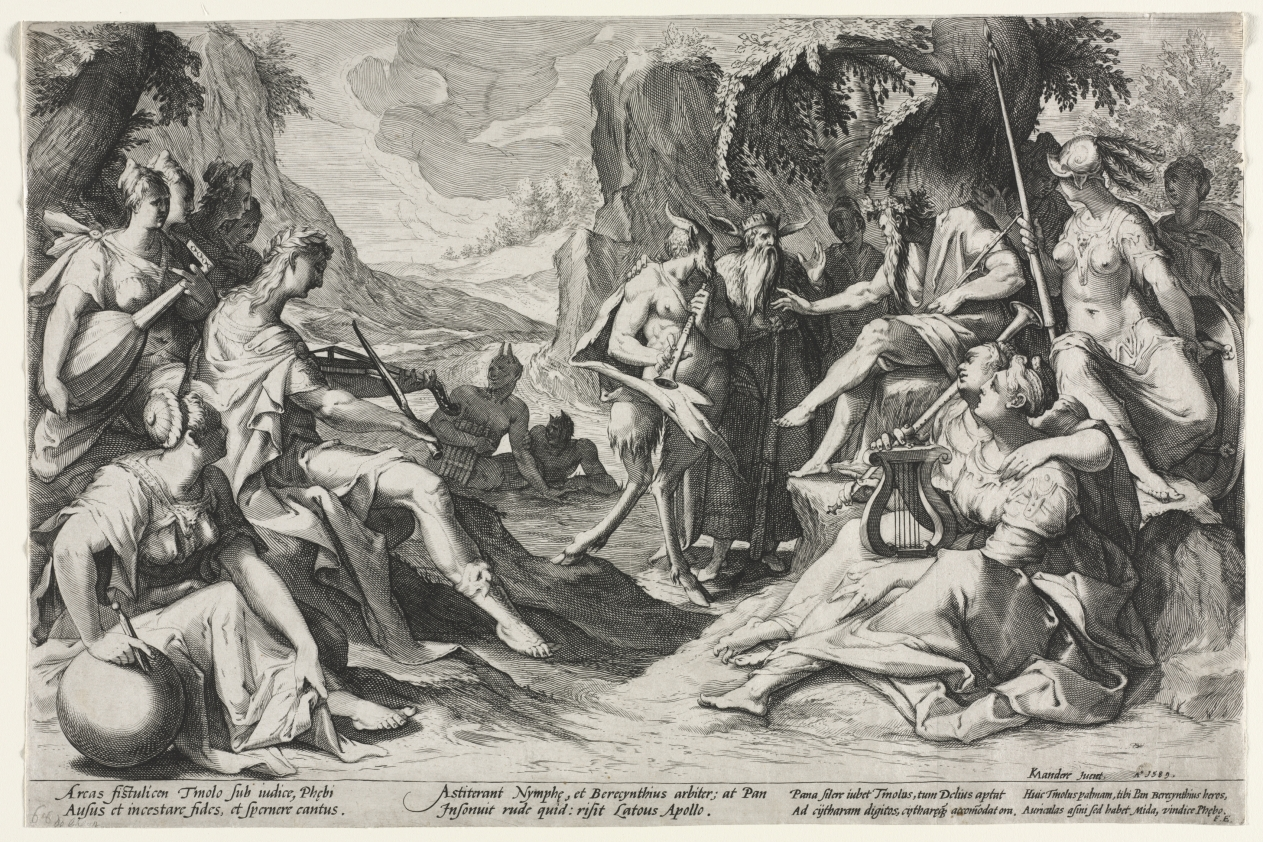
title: The Judgment of Midas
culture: Netherlands, 16th century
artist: Nicolaes Clock (Dutch)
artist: after Karel I van Mander (Netherlandish, 1548–1606)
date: 1589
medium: engraving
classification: Print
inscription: lower right, in plate: KM[in monogram]andere Iuent. A°1598. ; across bottom, in plate: Arcas fistulicen Tmolo sub iudice, Phaebi / Ausus et incestare fides, et spernere cantus. / Astiterant Nymphae, et Berecynthius arbiter; at Pan / Insonuit rde quid: risit Latous Apollo. / Pana silere iubet Tmolus, tum Delius aptat / Ad cÿtharam digitos, cytharaeque accomodat ora. / Huic Tmolus palmam, tibi Pan Berecynthius heros, / Auriculas asini sed habet Mida, vindice Phaebo. F.E. ; lower left, in graphite: 6 6 Do liheur[?]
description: Karel van Mander (1548–1606) is best known as an author, although he was most active as an artist under the influence of Goltzius. His most famous work is the 1604 publication, Het Schilder-boeck (The Book of Painters), a part-theoretical and part-biographical study. In 1583, Van Mander settled in Haarlem, and became closely involved with Goltzius and his circle.